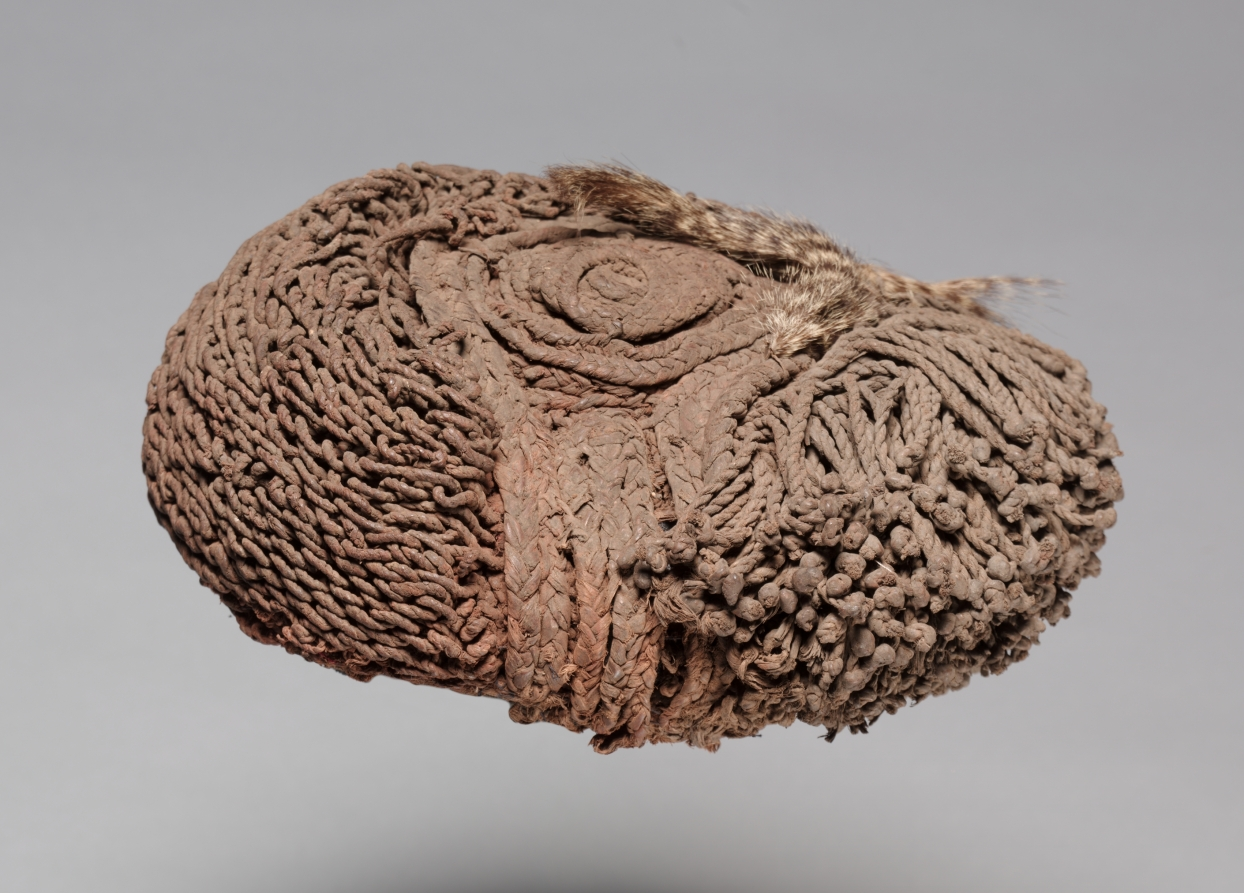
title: Wig (uyembe matota, wiyembe, or pulumba)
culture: Central Africa, Democratic Republic of the Congo or Angola, Chokwe, early to mid 20th century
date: early to mid 1900s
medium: Plant fiber, pelt, and clay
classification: Garment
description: Among the Chokwe, hats, diadems, and wigs of all sorts made in a variety of materials were once commonly worn by both men and women. Some were exclusive to religious and political titles. This wig imitates a female hairstyle in vogue until the 1960s. Made by a male craftsman, it was most typically worn by a woman at dances and other public festivals.